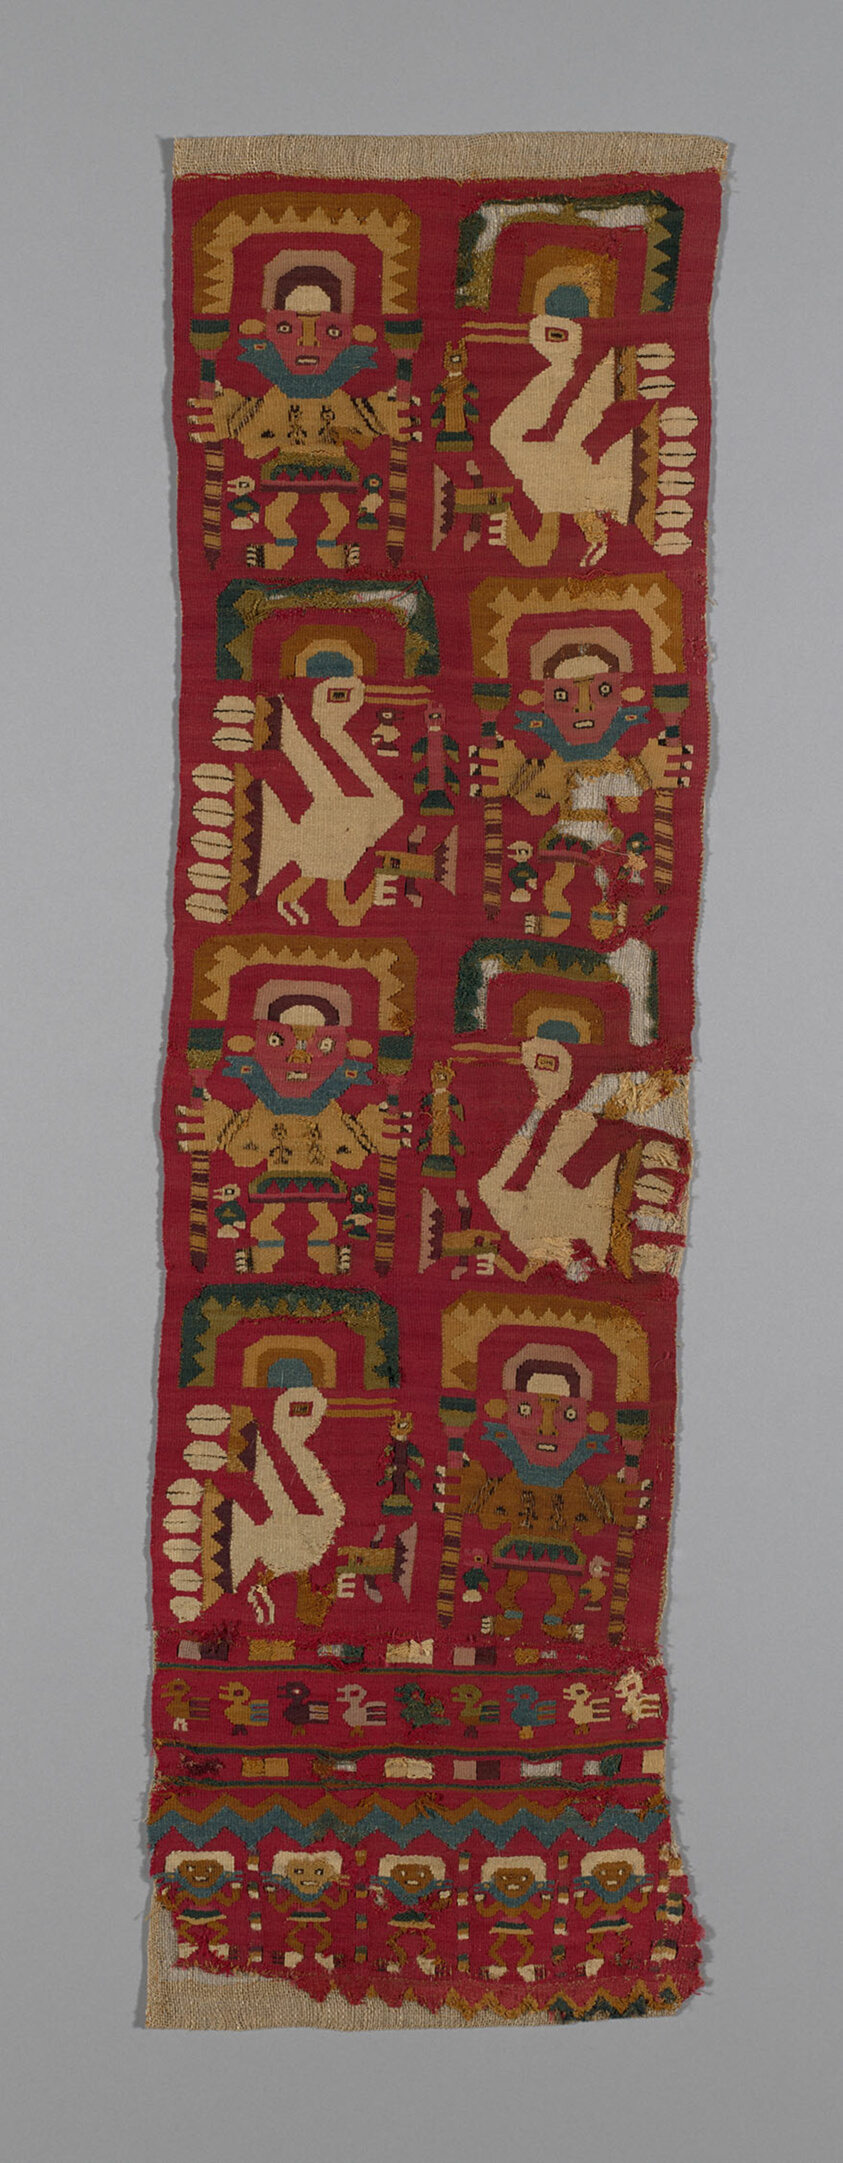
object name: Textile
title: Panel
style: lambayeque, Pre-Columbian, middle horizon, americas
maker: Lambayeque (North coast, Peru)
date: 1000/1476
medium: Cotton and wool (camelid), slit tapestry weave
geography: Peru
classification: weaving; textile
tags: birds, animals, staffs, fish, anthropomorphic figure, geometric motif, headdresses, human, super/natural